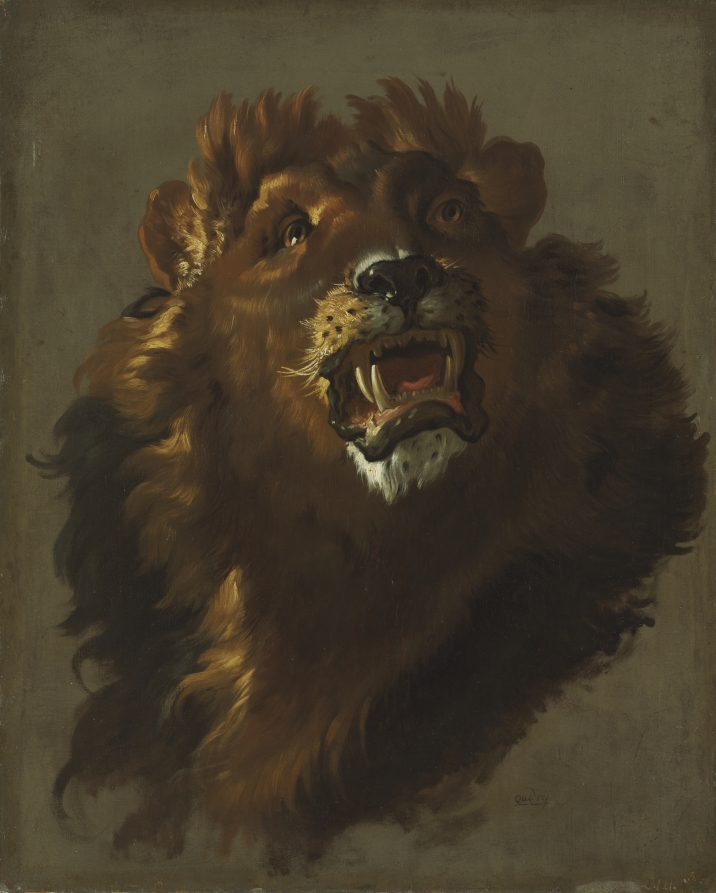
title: Lion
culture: France, 18th century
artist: Giuseppe Baldrighi (Italian, 1723–1803)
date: 1750s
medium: oil on canvas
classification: Painting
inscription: signed lower right: Oudry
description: Looking upward with eyes gleaming and mouth open, the lion conveys wild elegance. The sketch comprises short brushstrokes, and its most striking detail is the thick and plentiful mane. Undefined planes of black make up the lion's longest tresses, but closer to the face, the mane becomes increasingly light. Although the darkest parts of the mane lack precise definition, the chestnut shades of the mane host shadows and highlights that lend a sense of realism. Additionally, varied shades of brown are contrasted by the lighter, creamier shades of white at the lion's muzzle. The lifelike nature of this sketch is further communicated by the bright, wet patches on the lion's nose and mouth. Likewise, a bright glimmer in the lion's right eye illustrates its vitality. At the bottom right of the lion, a small signature attributes the painting to the French animal painter Jean-Baptiste Oudry, although this signature was a later addition. This is actually the work of the Italian painter Giuseppe Baldrighi, court artist to the Dukes of Parma. Sent to Paris in 1752, Baldrighi studied with a number of leading French painters, including Oudry, leading to a number of animal studies in Oudry's style. These works emulate the elder artist's smooth handling and stem directly from Oudry's method of executing head studies of animals in expressive poses. This work has a much blunter facture, a more linear use of paint, and a lack of psychological depth in the animal's expression—all characteristic of Baldrighi.